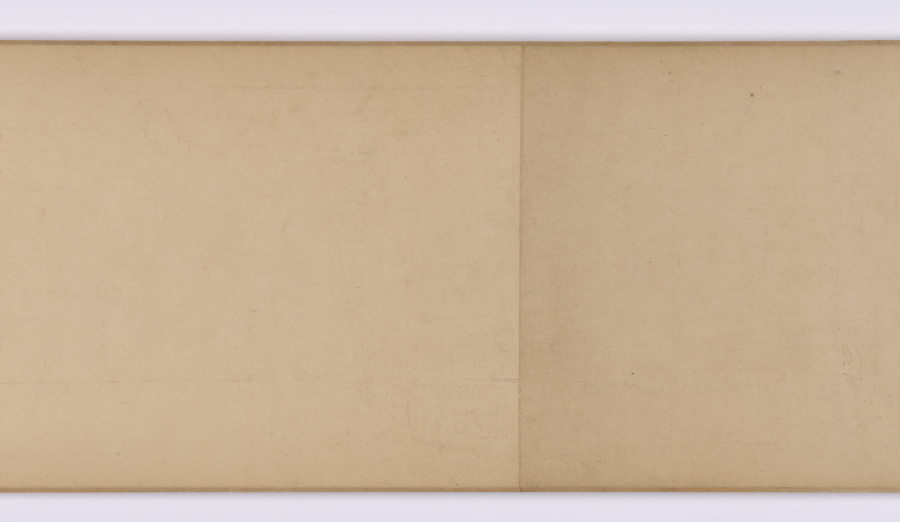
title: Poetic Feeling in a Thatched Pavilion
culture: China, Yuan dynasty (1271-1368)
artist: Wu Zhen (Chinese, 1280–1354)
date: 1347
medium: handscroll; ink on paper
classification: Painting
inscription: 依村構草亭，端方意匠宏。 林深禽鳥樂，塵遠竹松輕。 泉石俱延賞，琴書悅性情。 何當謝凡近，任適慰平生。 至正七年丁亥冬十月，為元澤戲作草亭詩意。梅沙彌書 [印]楳華盦; 嘉興吳鎮仲圭書畫記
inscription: 我愛梅花翁，巨老傳心印。 脩此水墨缘，種種得蒼潤。 樹石墮筆鋒，造化不能吝。 而今橡林下，我願執掃汛。 後學沈周 [印]启南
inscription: Colophon by Chen Rentao (1952): 予求梅道人畫二十年不可得。所見多膺鼎，即故宮所藏山水數軸都不可靠。傳世真迹，惟《漁父圖》、《嘉禾八景》與此《草亭詩意》而已。壬辰十月十四日余大病初愈，居家休養，研山師忽持此圖相贈。展卷披覽，頓覺精神沛振，如服僊藥。同日又得宋拓柳公權《神策軍紀聖德碑》，及群玉堂藏《真草書千(字)文》，皆海內孤本。一日得數寶，欣喜何如，書以志幸。 陳仁濤識 [印]陳氏仁濤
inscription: Colophon by Chen Rentao: 此圖作於至正七年丁亥，時年六十八，盖其晚年神品也。 濤又識 [印]陳仁濤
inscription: Title on frontispiece by Li Dongyang 李東陽 (1447-1516).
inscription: 33 additional seals: 1 seal of Li Chao-heng 李肇亨 (1592-1664)：檇李李肇亨書畫記; 9 seals of Liang Qingbiao 梁清標 (1620-1691): 蒼巖子、蕉林、蕉林梁氏書畫之印、蕉林秘玩、蕉林書屋、蕉林玉立氏圖書、棠邨 (appears twice)、棠邨審定; 1 seal of Wang Yirong (1845-1900): 懿榮; 3 seal of Li Yanshan (1898-1961): 雙銕笛樓 (appears twice)、硯山心賞; 12 seals of Chen Rentao 陳仁濤（1906-1968）：陳氏仁濤、陳仁濤珍藏印、金匱寶藏·陳氏仁濤 (appears three times)、金匱秘笈、金匱室、金匱室精鑒璽 (appears twice)、金匱室主、金匱神品、仁濤奇緣; 1 seal: 崐溟居士; 1 seal: 林止在㭯生圖書印; 3 seals unidentified.